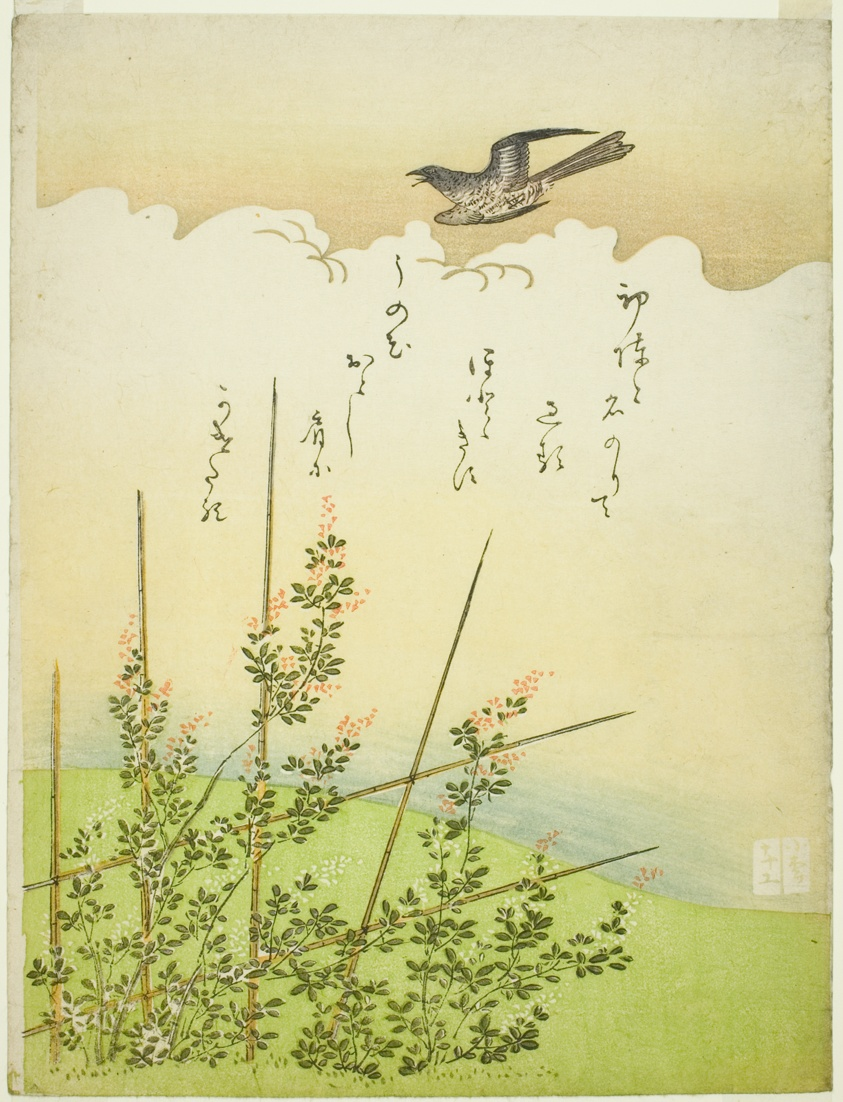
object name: Print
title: Cuckoo flying over deutzia flowers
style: Japanese (culture or style)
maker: Komatsuya Hyakki (Japanese, 1720–1793 (?))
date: c. 1766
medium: Color woodblock print; chuban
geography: Japan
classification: print; asian art